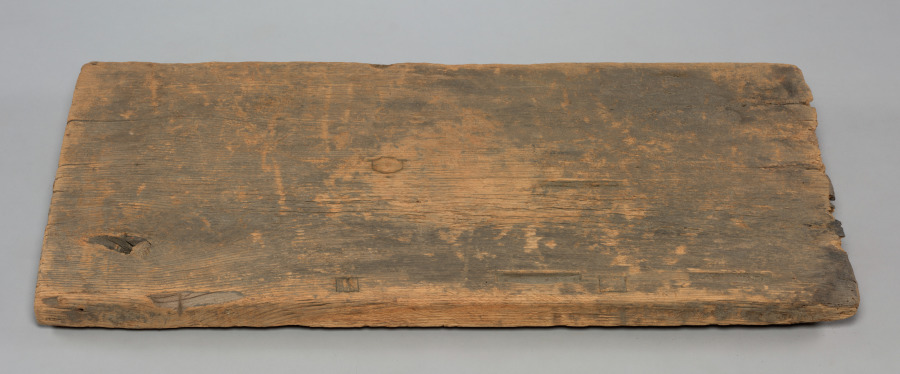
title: Chest on Wheels (Kurumadansu)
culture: Japan, Edo period (1615–1868)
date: 1715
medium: wood with iron fittings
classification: Furniture and woodwork